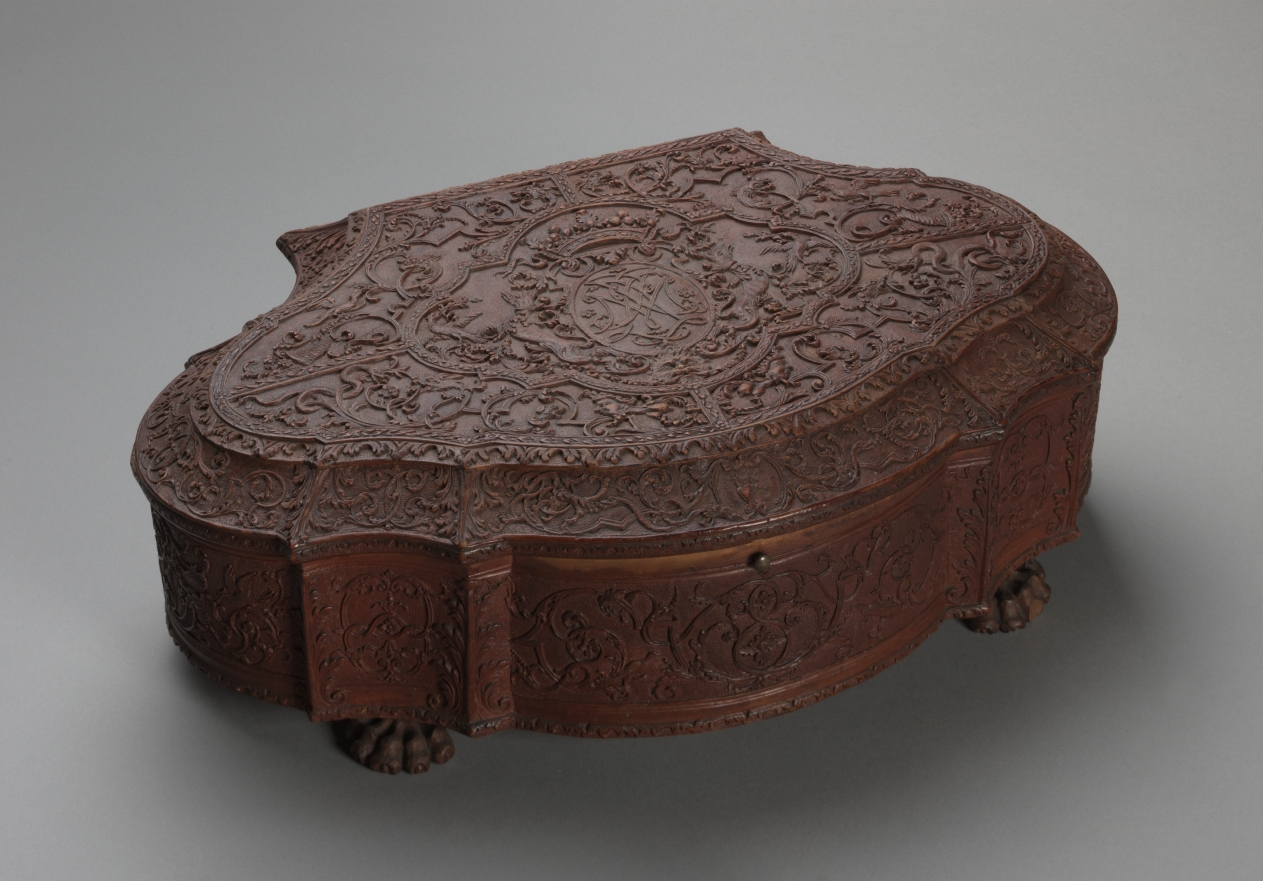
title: Box (1 of 2)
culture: France, Nancy, early 18th century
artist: Bagard (French)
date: early 1700s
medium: wood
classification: Furniture and woodwork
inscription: on top of box, initials crowned by coronet